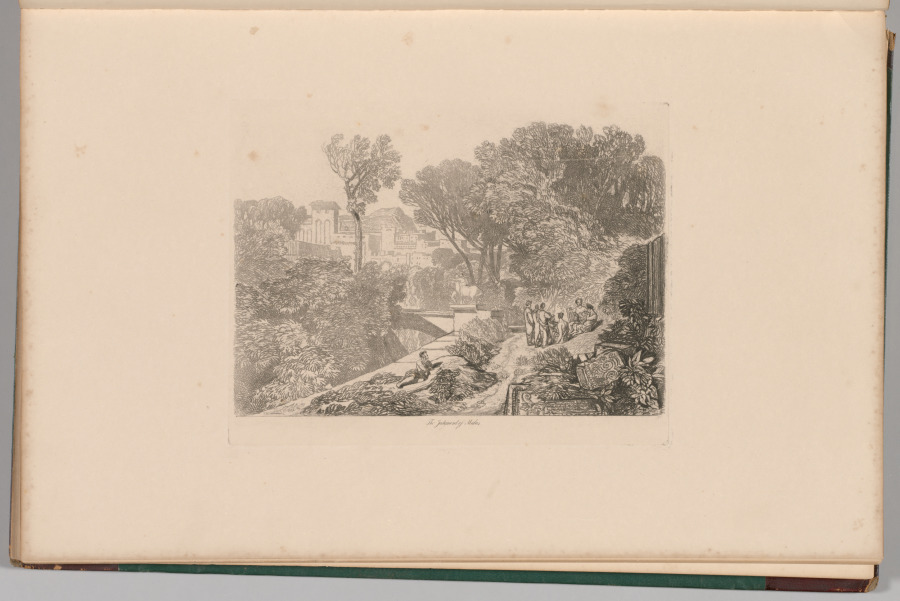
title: Liber Studiorum: Plate 6, The Judgment of Midas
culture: England, 19th century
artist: John Sell Cotman (British, 1782–1842)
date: 1838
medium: softground etching, from a bound volume containing 48 plates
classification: Bound Volume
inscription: In plate, within image, upper right: 6; in plate, within image, J S. Cotman; in plate, below image: The Judgment of Midas